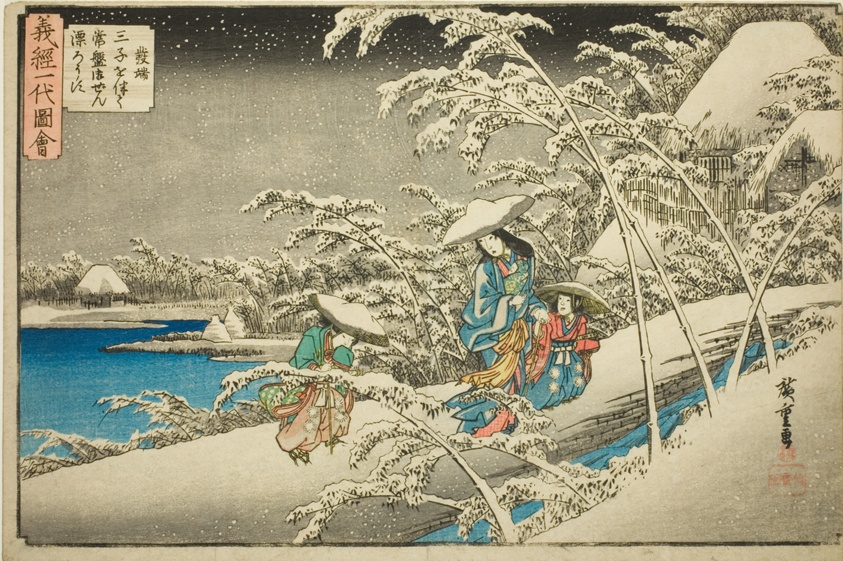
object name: Print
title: The Beginning: Tokiwa Gozen Fleeing with Her Three Children (Hattan, sanshi o tomonatte Tokiwa Gozen hyorosu), from the series "The Life of Yoshitsune (Yoshitsune ichidai zue)"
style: Japanese (culture or style)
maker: Utagawa Hiroshige 歌川 広重; Japanese, 1797-1858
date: c. 1832/34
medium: Color woodblock print; oban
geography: Japan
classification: woodblock print; print; asian art